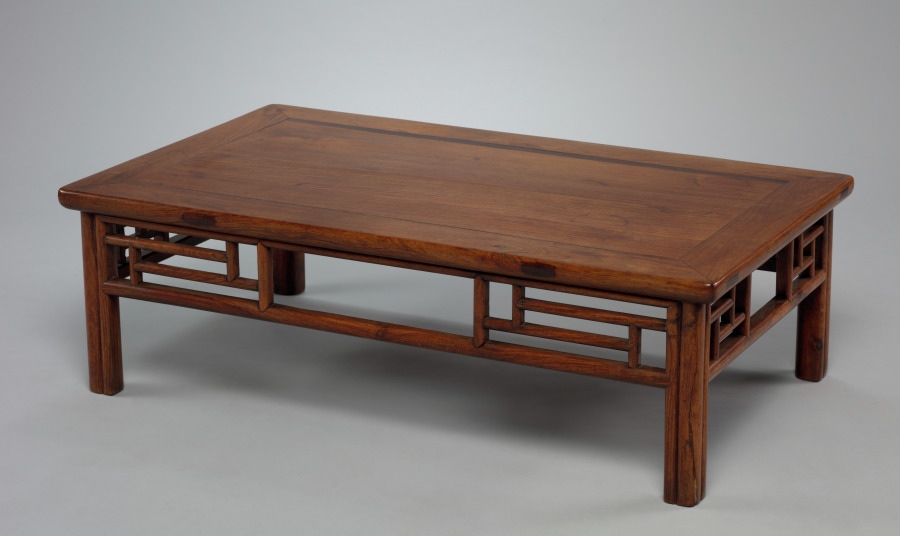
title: Table to hold a chest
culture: China, Qing dynasty (1644-1911)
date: early 1700s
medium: Rosewood (huanghuali)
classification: Furniture and woodwork